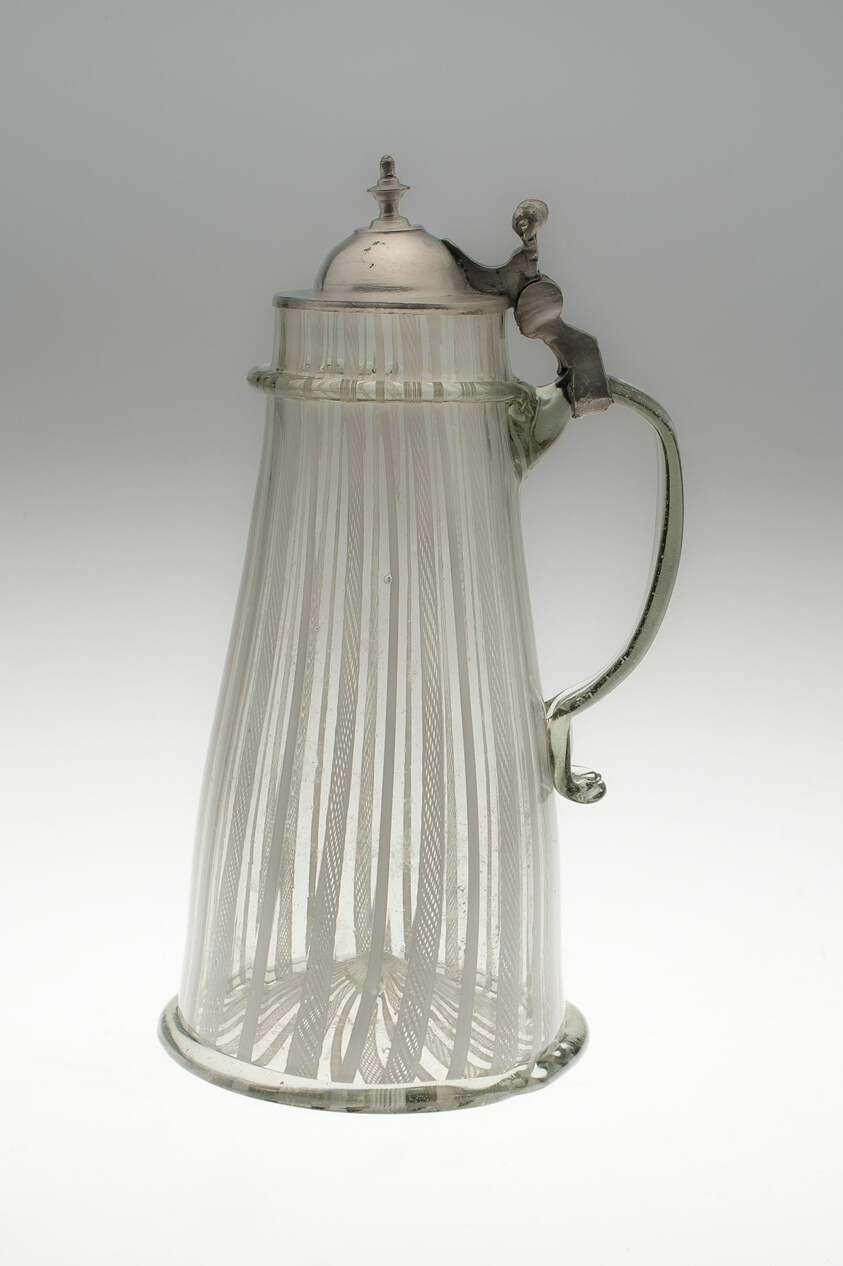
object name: Glass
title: Covered Tankard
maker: Southern Netherlands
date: c. 1600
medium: Glass with pewter mounts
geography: Netherlands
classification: glass; european decorative arts